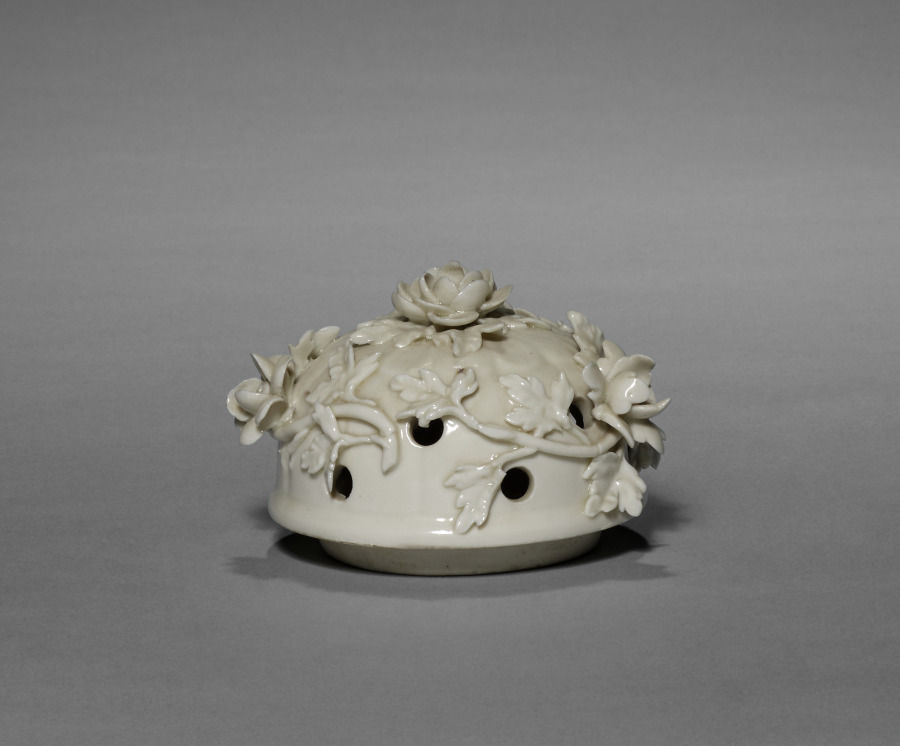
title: Cover for a Potpourri Vase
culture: France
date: 1860–80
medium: blanc-de-chine porcelain; gilt bronze mount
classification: Ceramic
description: This cover is part of a pair of covered vases that were created to contain potpourri, a mixture of flowers, herbs, and spices emitting ambient fragrance. This specific function offered a particularly fertile ground for the development of French porcelain from the mid-1700s, as manufactories experimented with forms, surface ornamentations, and placement of perforations. Produced by the firm of Edmé Samson in the 1800s, the vases pay homage to this history. While using updated technique and material, as well as more exuberant decorations, these vases draw upon designs by earlier innovators such as the Saint-Cloud manufactory.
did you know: Potpourri vases always have holes in the top to let the scent of dried spices and flowers contained within freshen the air around them.